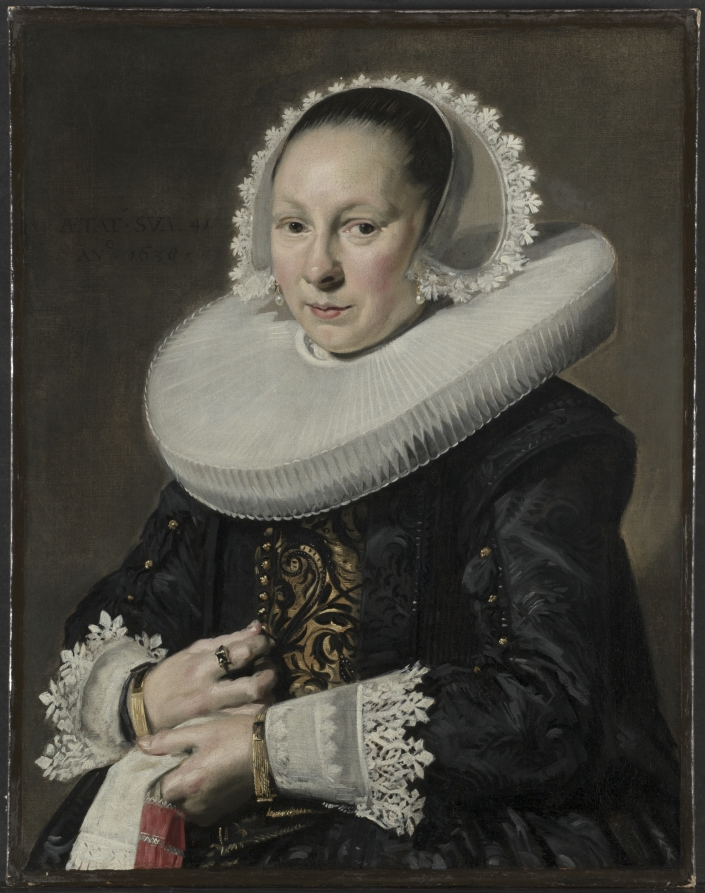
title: Portrait of a Woman, probably Aeltje Dircksdr. Pater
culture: Netherlands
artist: Frans Hals (Dutch, c. 1581–1666)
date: 1638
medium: oil on canvas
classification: Painting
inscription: Inscribed upper left: "AETAT SUAE 41 / ANNO 1638"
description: Portraits by Hals often feature bold, jagged brushstrokes. This portrait shows him experimenting with the “wet-into-wet,” technique, in which layers of paint were added in succession without being allowed to dry in between. Note the blended strokes used at the woman’s hairline to suggest individual strands of hair. The sitter has been tentatively identified as Aeltje Dircksdr. Pater (1597–1678), wife of the Haarlem brewer and burgomaster (mayor) Jan de Wael (1594–1663). An inscription states she was 41 when Hals painted her.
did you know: Jewelry, lace, and sumptuous fabrics show off this woman's wealth—and the artist's skill in painting them.